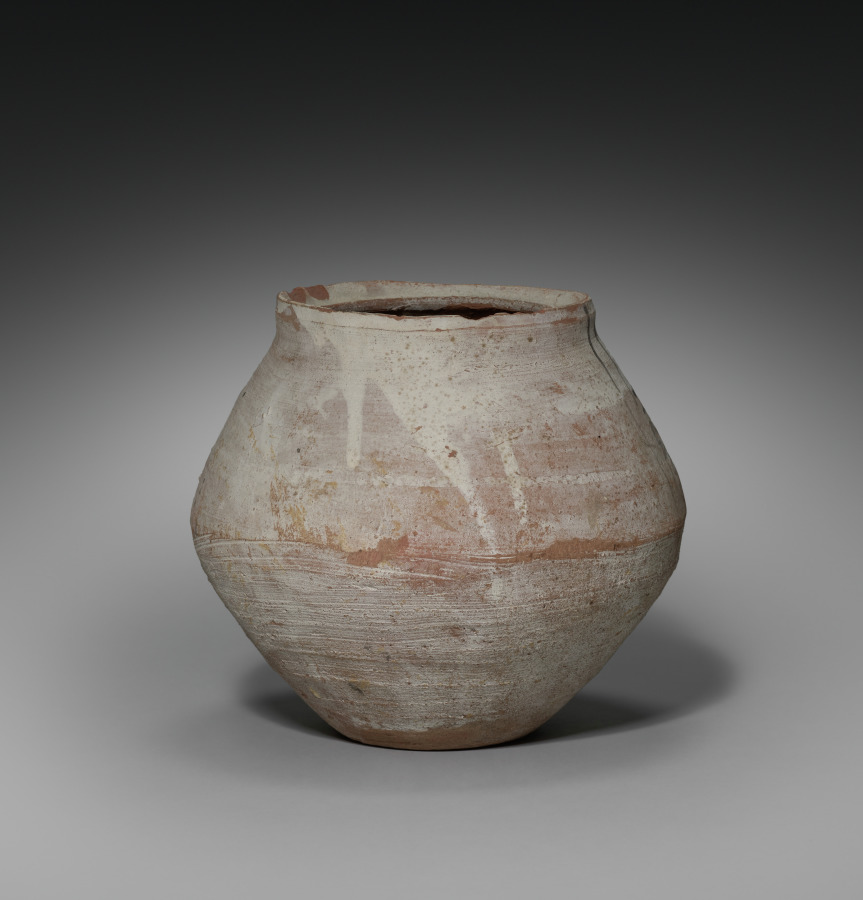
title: Shawabty Jar with Lid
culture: Egypt, New Kingdom (1540–1069 BCE), Dynasties 19–20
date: 1295–1069 BCE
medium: Nile silt ware; lid of limestone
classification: Funerary Equipment